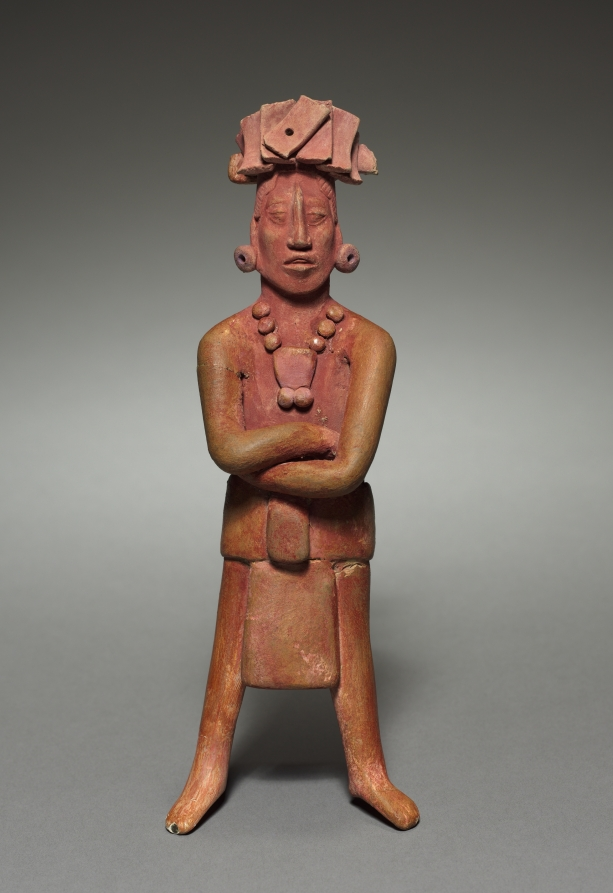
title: Figure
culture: Mexico, Jaina, Campeche, Maya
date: 317–987 CE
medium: terracotta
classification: Ceramic